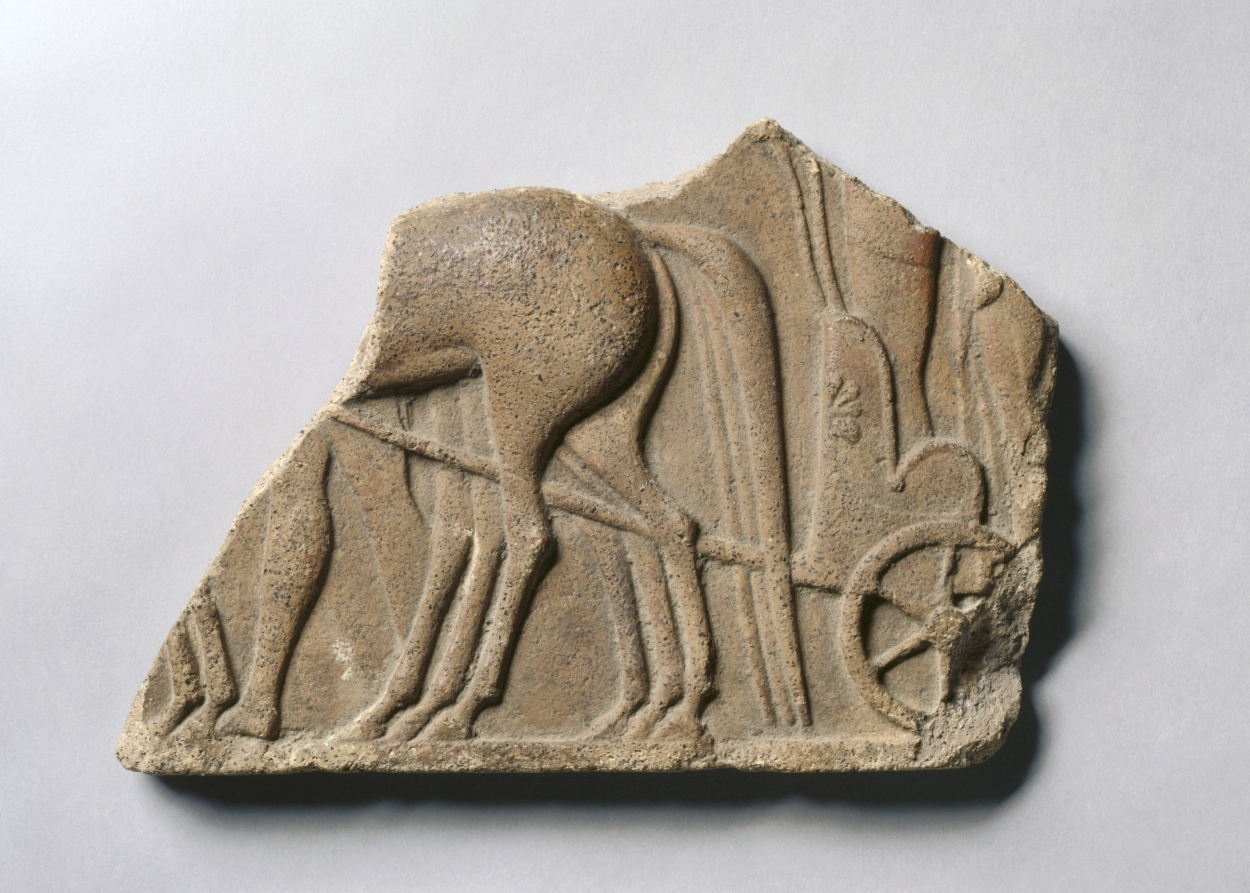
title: Plaque Fragment of Horses and Chariot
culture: Etruscan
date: 500–475 BCE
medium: terracotta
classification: Sculpture